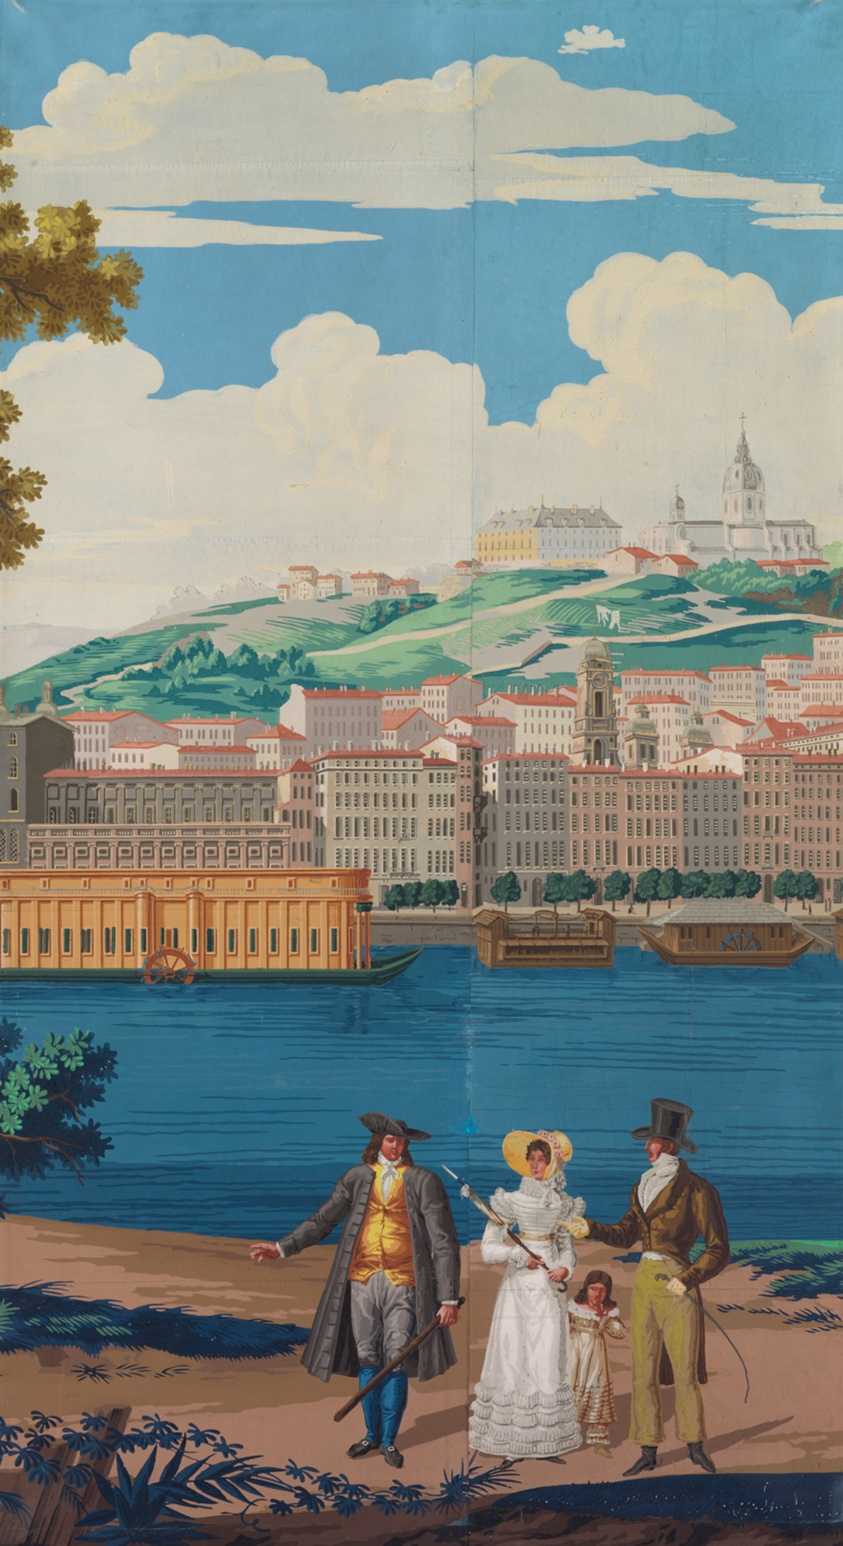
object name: Coverings and Hangings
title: Wallpaper Panel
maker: France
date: Early 19th century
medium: Paper and polychrome paints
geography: France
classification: wallpaper; paper; european decorative arts